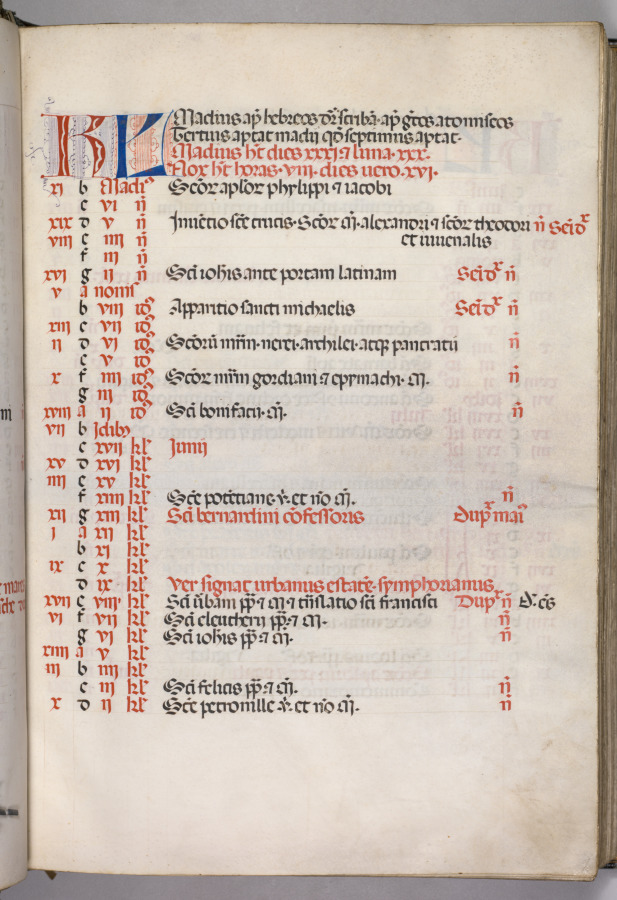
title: Missale: Fol. 5r: May Calendar Page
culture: Italy, Perugia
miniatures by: Bartolommeo Caporali (Italian, c. 1420–1503)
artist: assisted by Giapeco Caporali (Italian, d. 1478)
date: 1469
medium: ink, tempera and burnished gold on vellum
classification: Bound Volume